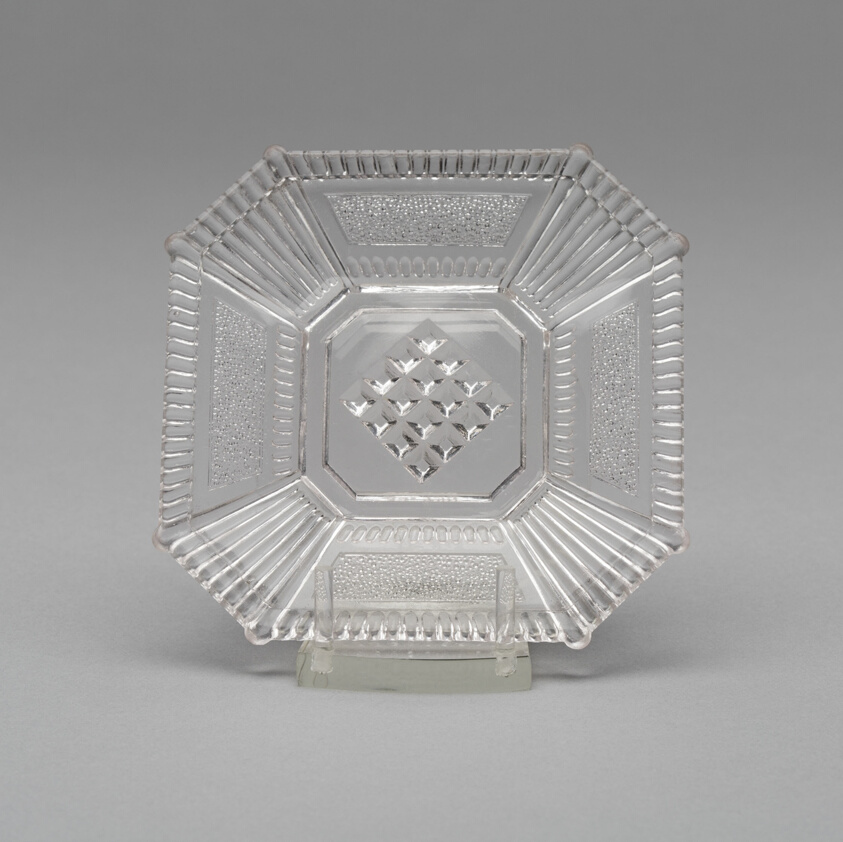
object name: Glass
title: Square plate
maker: Artist unknown (American, 19th century)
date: c. 1860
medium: Pressed glass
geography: United States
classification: plate (general, dish); glass; american decorative arts; american arts; decorative arts